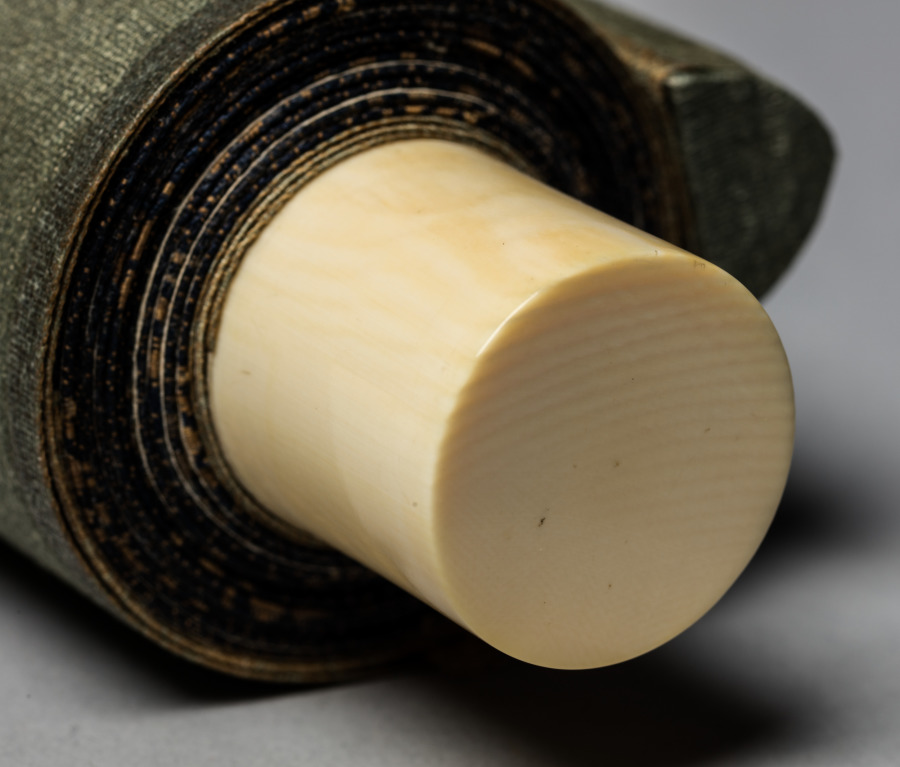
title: Grapevine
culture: China, Qing dynasty (1644–1911)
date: 1700s–1800s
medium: hanging scroll; ink on paper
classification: Painting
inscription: Two-line calligraphic inscription with signature. 5 unidentified seals.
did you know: Clusters of grapes can represent both abundant wealth and numerous offspring.